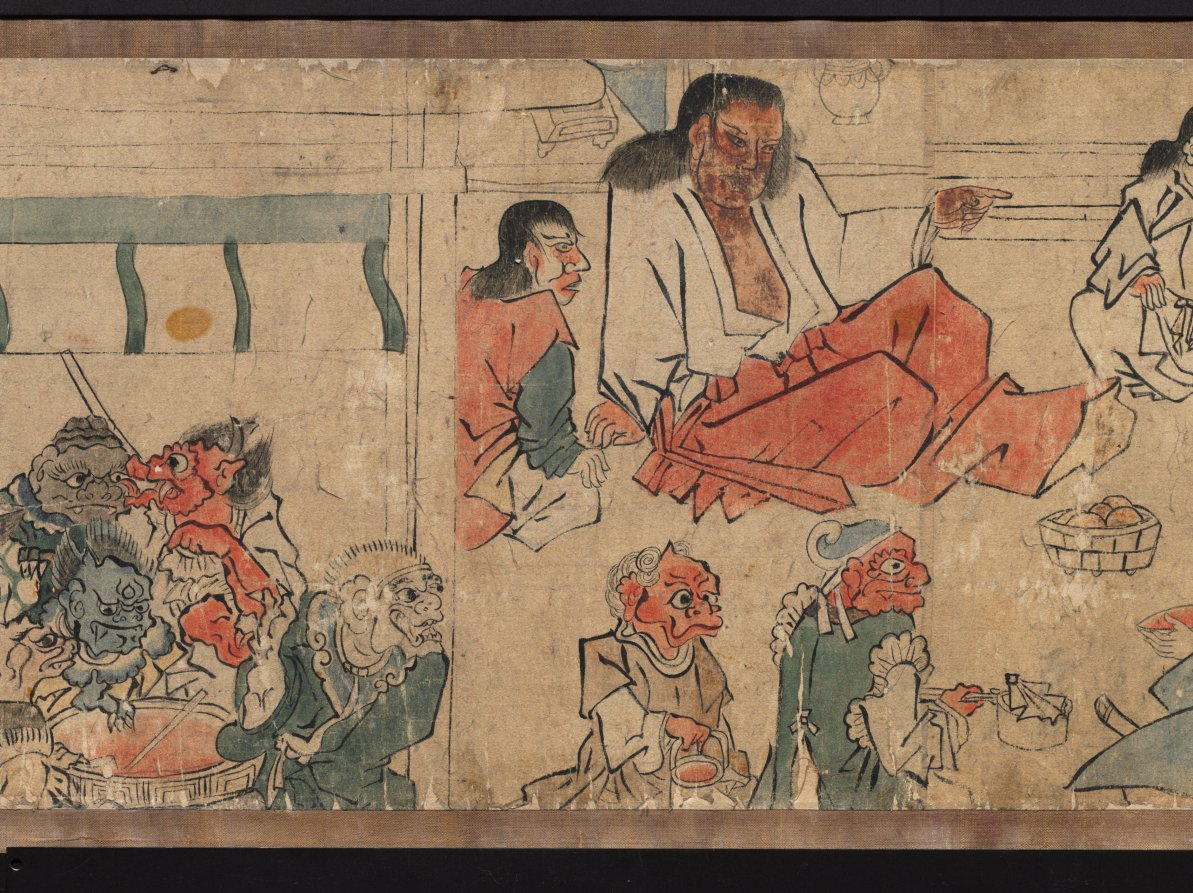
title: Oeyama Engi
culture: Japan, Edo period (1615–1868)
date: 1615–1868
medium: one of a pair of handscrolls; ink and color on paper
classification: Painting